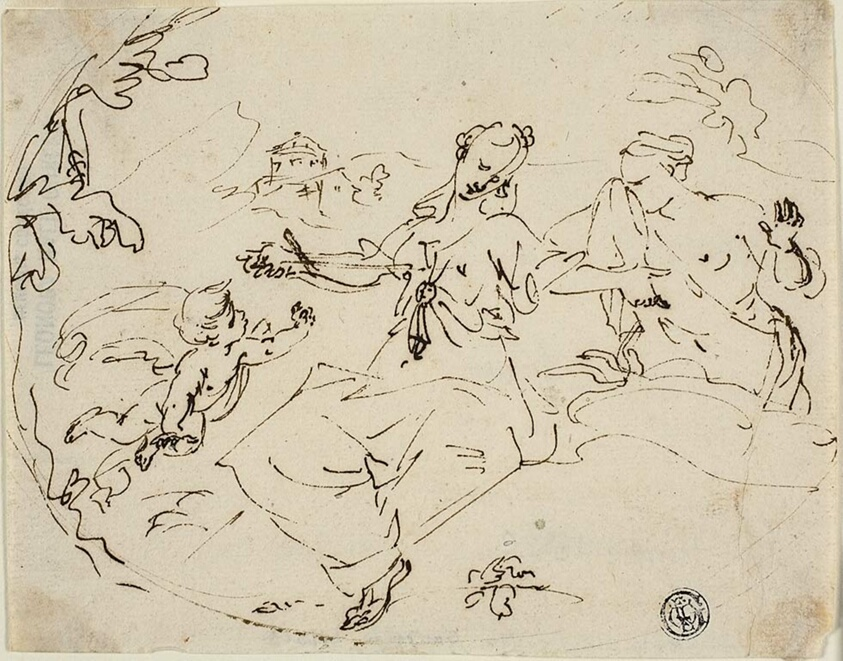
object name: Drawing and Watercolor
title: Death of Dido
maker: Possibly Donato Creti; Italian, 1671-1749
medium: Pen and brown ink, on ivory laid paper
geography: Italy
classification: pen and ink drawings; drawings (visual works); prints and drawing